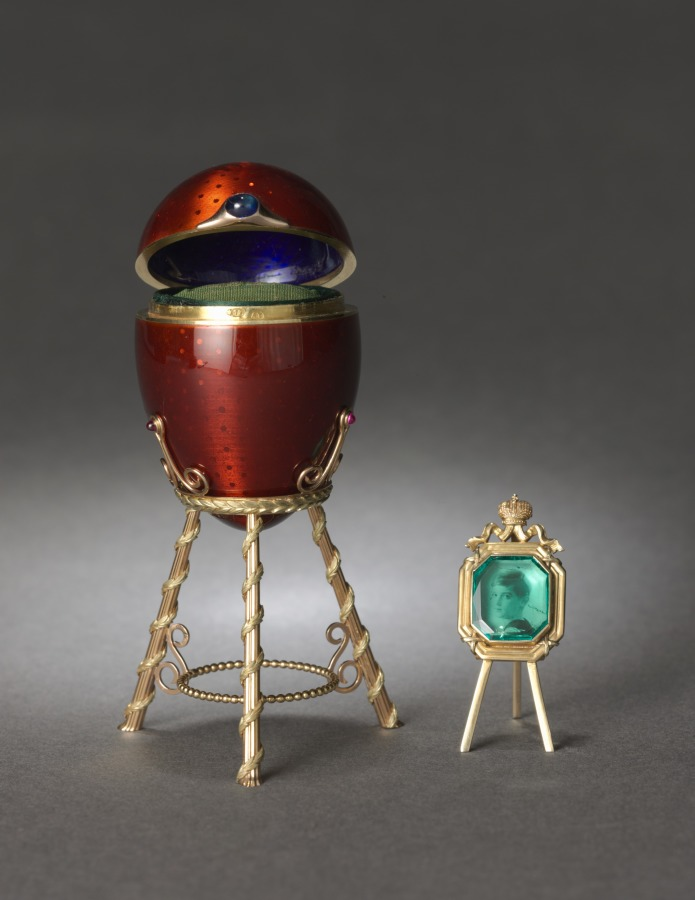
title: Egg on Stand with Easel and Photograph of Tsarevich Alexei Nikolaievich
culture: Russia, St. Petersburg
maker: Alexander Edward Tillander (Russian, 1837–1918)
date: c. 1890–1896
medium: gold, enamel, sapphire, gold easel and stand, paper, faceted green glass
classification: Miscellaneous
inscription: engraved beneath the enamel of the top are the Cyrillic letters "XB" [in monogram] which signify the phrase, "Christ is risen."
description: In the Russian Orthodox religious tradition, eggs are offered as Easter gifts to symbolize rebirth, renewal, and the resurrection of Christ. This jeweled Russian egg is engraved with XB symbolizing the phrase, “Christ is risen,” and would have been given to a lady in a wealthy household, perhaps someone of high rank within the imperial court, given the richness of materials.